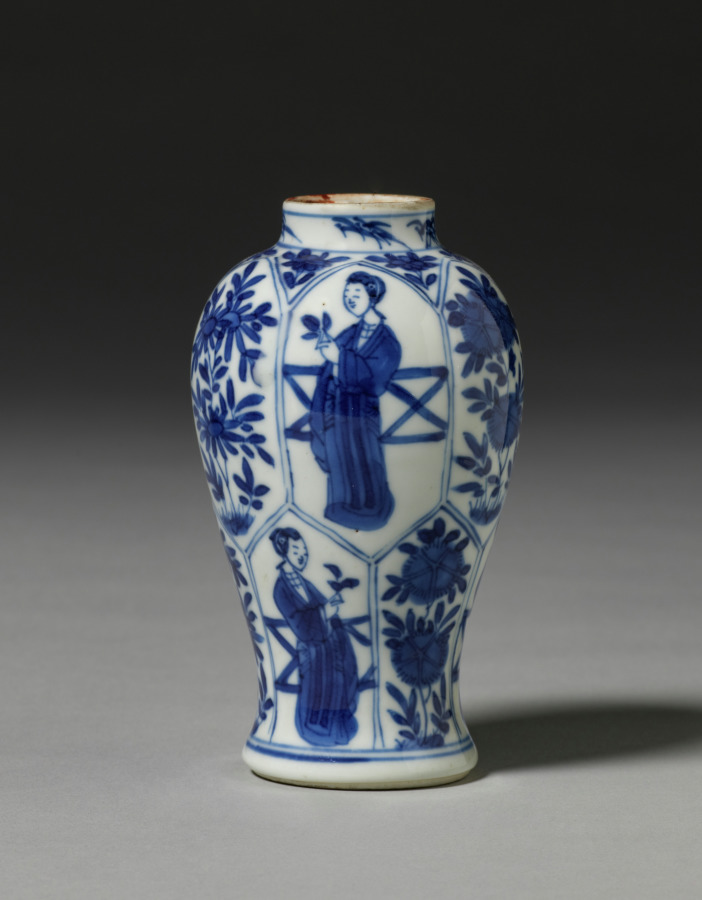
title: Jar with Cover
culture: China, Qing dynasty (1644-1911)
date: 19th Century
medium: porcelain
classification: Ceramic